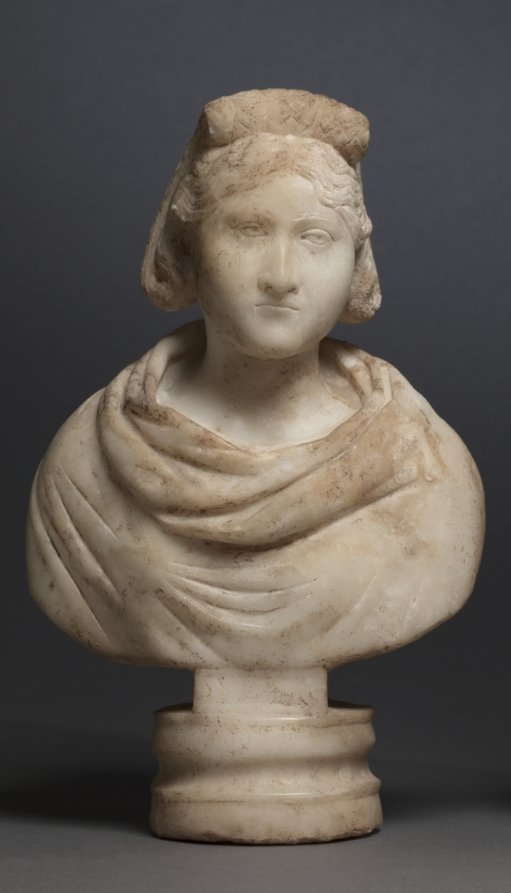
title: Portrait Bust of an Aristocratic Woman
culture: Anatolia, late Roman-early Christian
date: 280–90 CE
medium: marble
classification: Sculpture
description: These three pairs of marble portrait busts depict an aristocratic Roman couple. They are unique in representing the same couple three times with only minor variations in costume. Allegedly found together with the Jonah Marbles, they may represent the Christian patrons who commissioned the Jonah cycle.